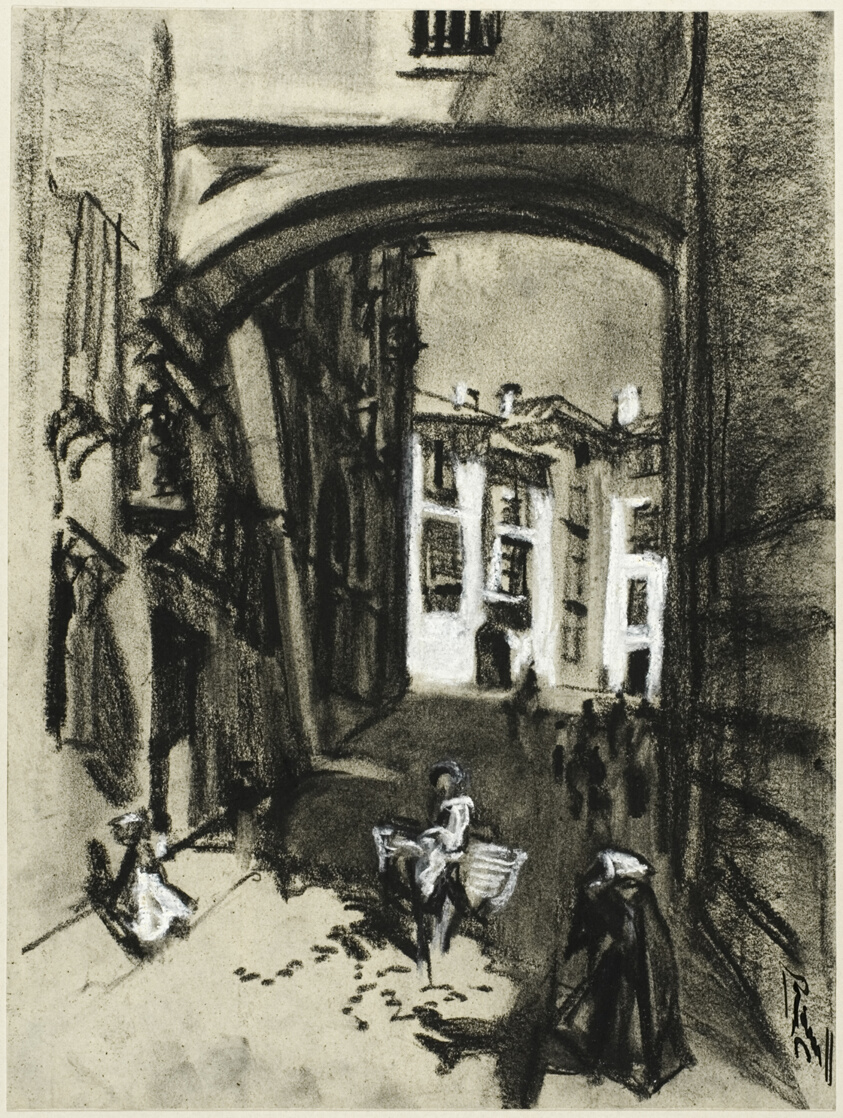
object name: Drawing and Watercolor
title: Toledo, Street of the Arch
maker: Joseph Pennell (American, 1857-1926)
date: c. 1903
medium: Oiled charcoal with stumping and erasing, heightened with white chalk, on cream wove paper, perimeter mounted on off-white wood pulp laminate board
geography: United States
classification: charcoal; drawings (visual works); prints and drawing